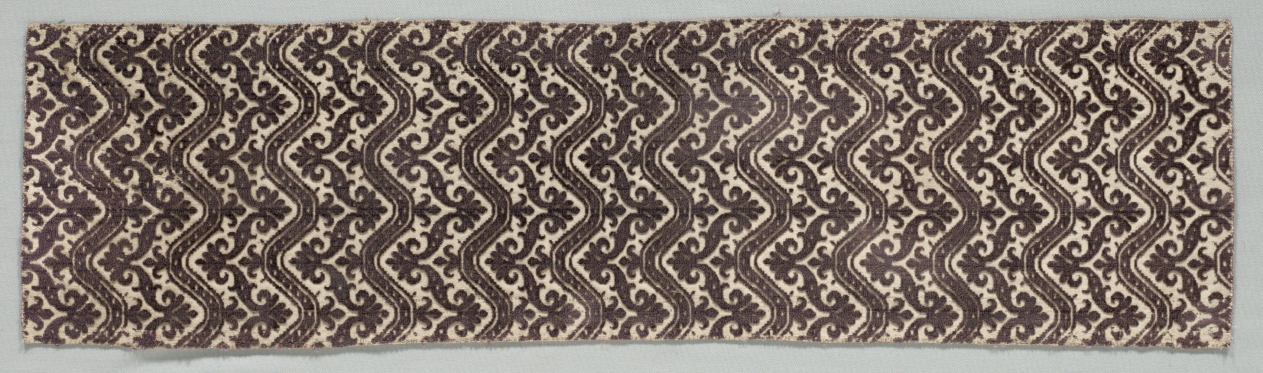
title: Velvet Fragment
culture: Italy, 1st third of 17th century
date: 1600–1640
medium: velvet (cut, uncut, and voided); silk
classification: Velvet